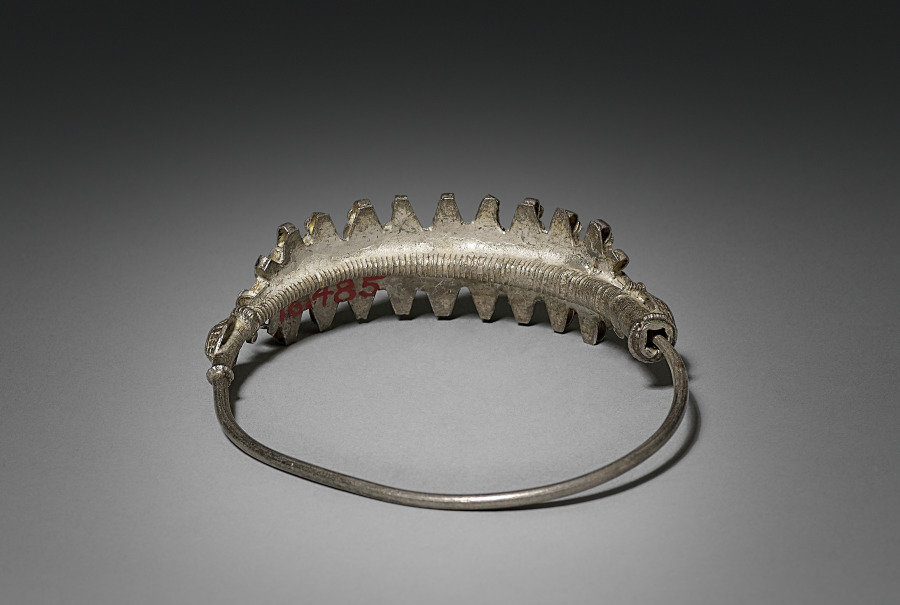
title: Nose Ring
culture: India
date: early 1900s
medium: silver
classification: Jewelry